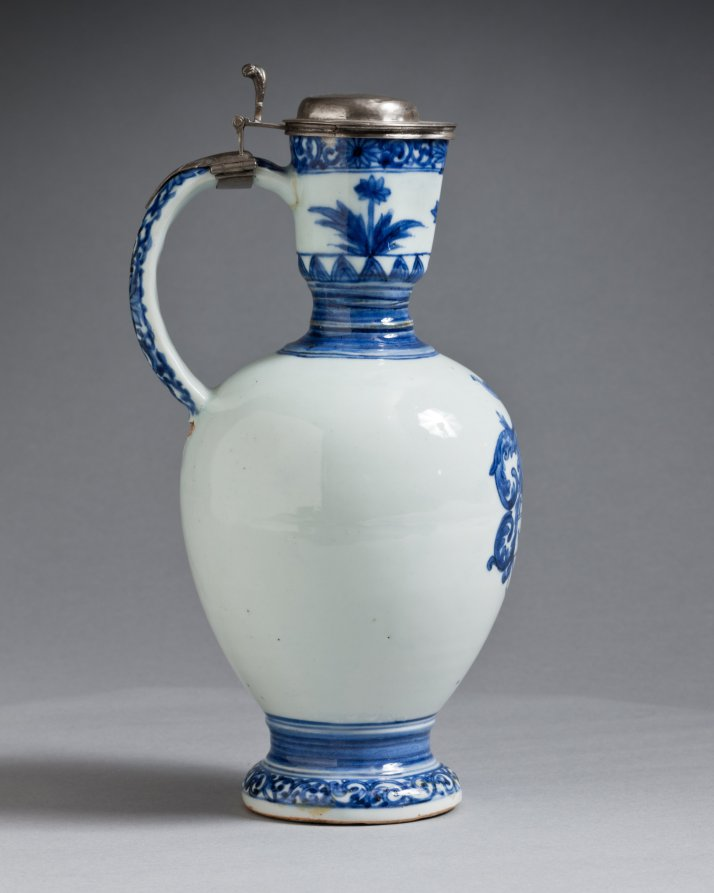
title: Jug with Silver Mounts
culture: Japan, Edo period (1615–1868)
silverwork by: Barent van Leeuwen (Dutch, 1637–1682)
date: c. 1662–76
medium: porcelain with underglaze blue decoration and silver mounts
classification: Ceramic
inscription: [on silver]: town mark for Amsterdam; lion rampant crowned (alloy mark for 0-934 silver); d (date letter for 1666), maker's mark of Barent van Leeuwen.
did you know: The coat of arms on this jug are those of the Valckenier family, active in the Dutch East India Company.